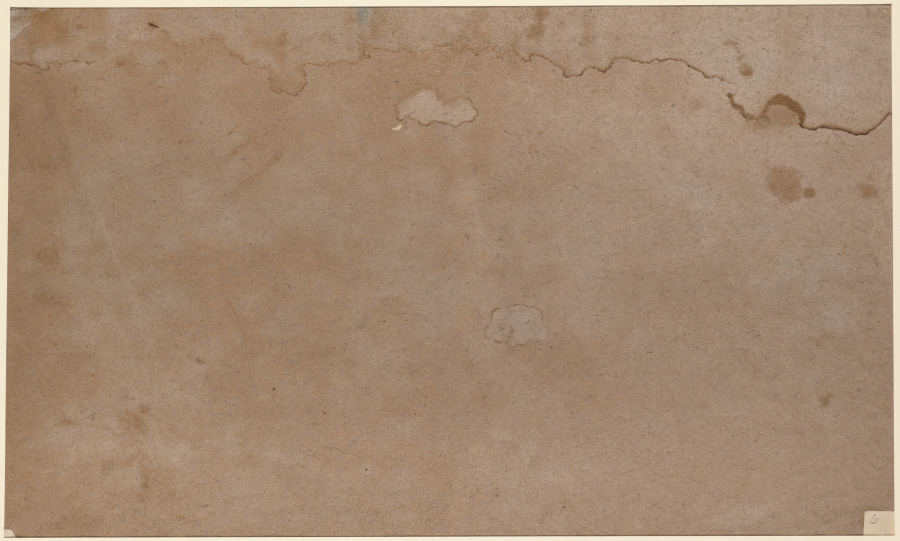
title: Wooded Landscape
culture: Netherlands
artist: Anthonie Waterloo (Dutch, 1609/10–1690)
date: after 1648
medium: Charcoal applied wet, brush and black and brown and white washes; black ink framing line on antique brown laid paper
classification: Drawing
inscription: On verso, pen or graphite inscription (erased?) A. Pynnier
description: Known exclusively for his drawings and prints, the Dutch artist Anthonie Waterloo specialized in tree studies and dense forest scenes such as this drawing. Here he created a vista through groupings of tall trees, producing the effect of shimmering light and movement with his unique technique of using wet charcoal over dry chalk. He added a subtle white wash throughout the center of the composition to create the hint of the sun’s glow beyond the trees. Such a work would have been sold as a finished work of art.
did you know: Studies of dense forests and individual trees were a specialty of Dutch artists in the 1600s.